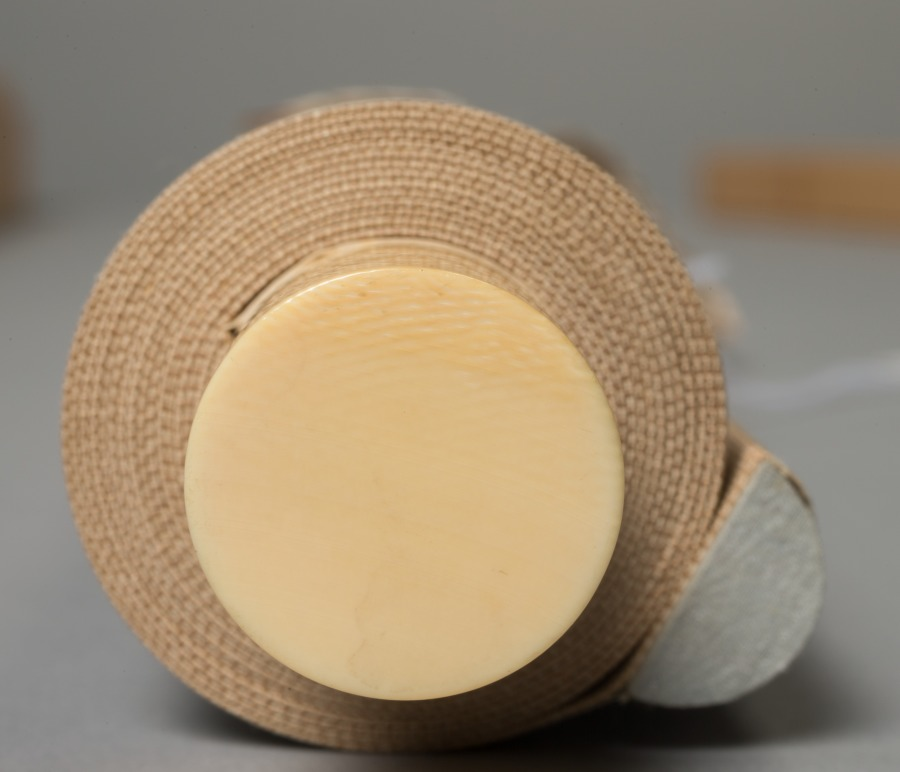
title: Aged Pine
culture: Japan, Edo period (1615–1868)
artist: Nakayama Kōyō (Japanese, 1717–1780)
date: 1717–80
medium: hanging scroll; ink on paper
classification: Painting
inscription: Artist's inscription and seal, lower right.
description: The ancient pine is an admired subject in Asian painting and symbolizes the desirable human qualities of wisdom and solid moral character.